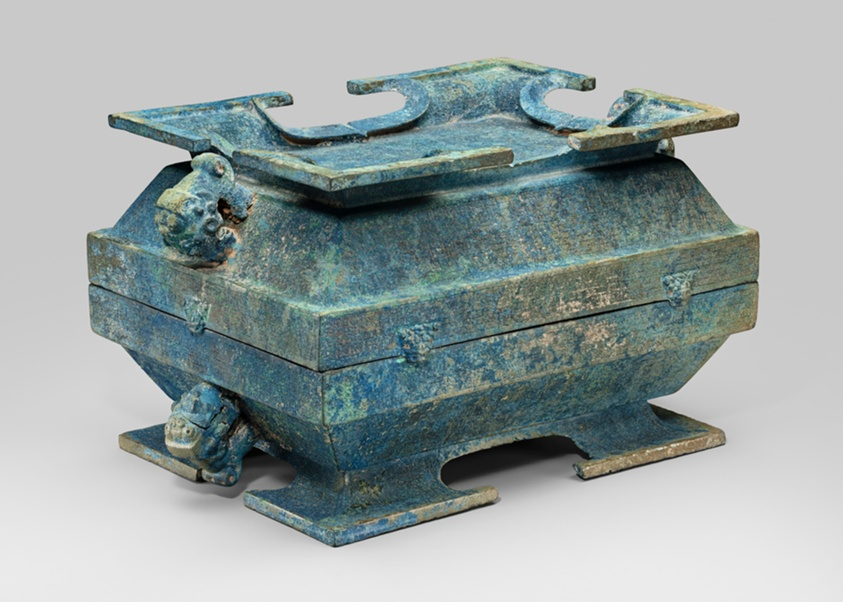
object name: Vessel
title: Rectangular Tureen (fu)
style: Chinese (culture or style)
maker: China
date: Eastern Zhou dynasty, Spring and Autumn period (770–481 B.C.)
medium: Bronze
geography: China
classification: vessel; bronze; metal; asian art